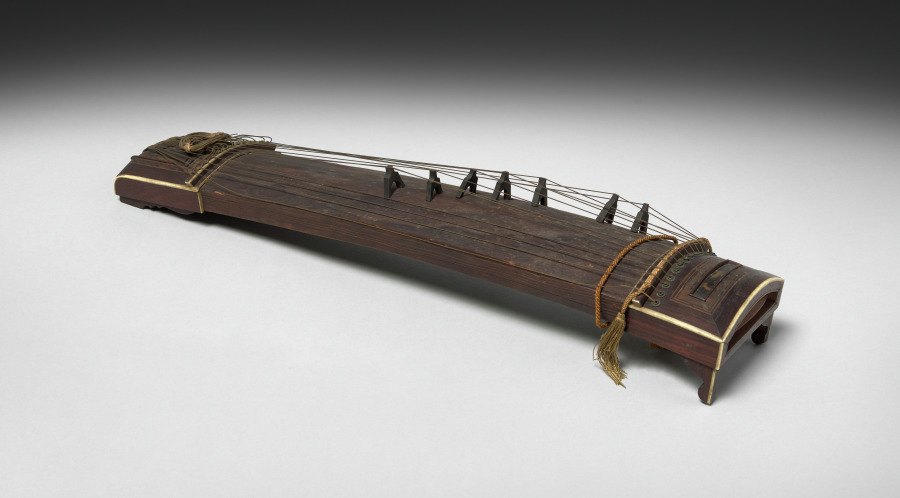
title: Koto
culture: Japan, Edo period (1615–1868)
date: early to mid-1800s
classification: Musical Instrument